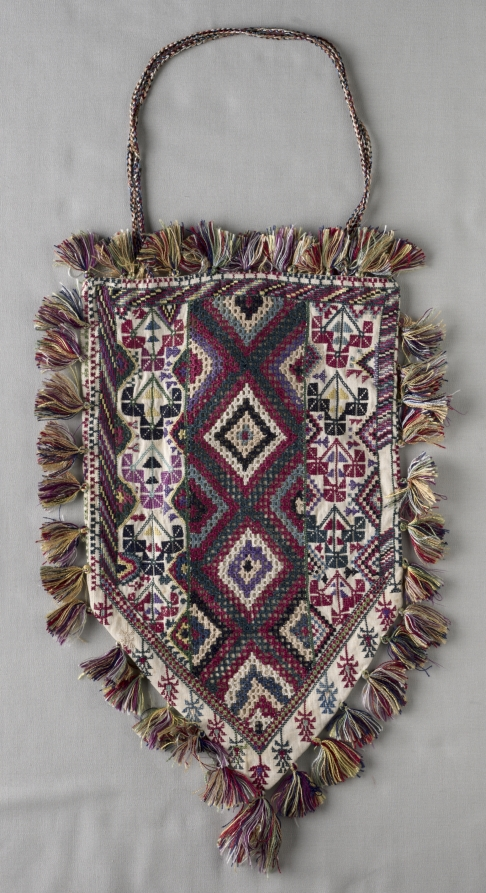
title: Bag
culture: Turkey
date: before 1957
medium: silk embroidery on cotton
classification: Embroidery